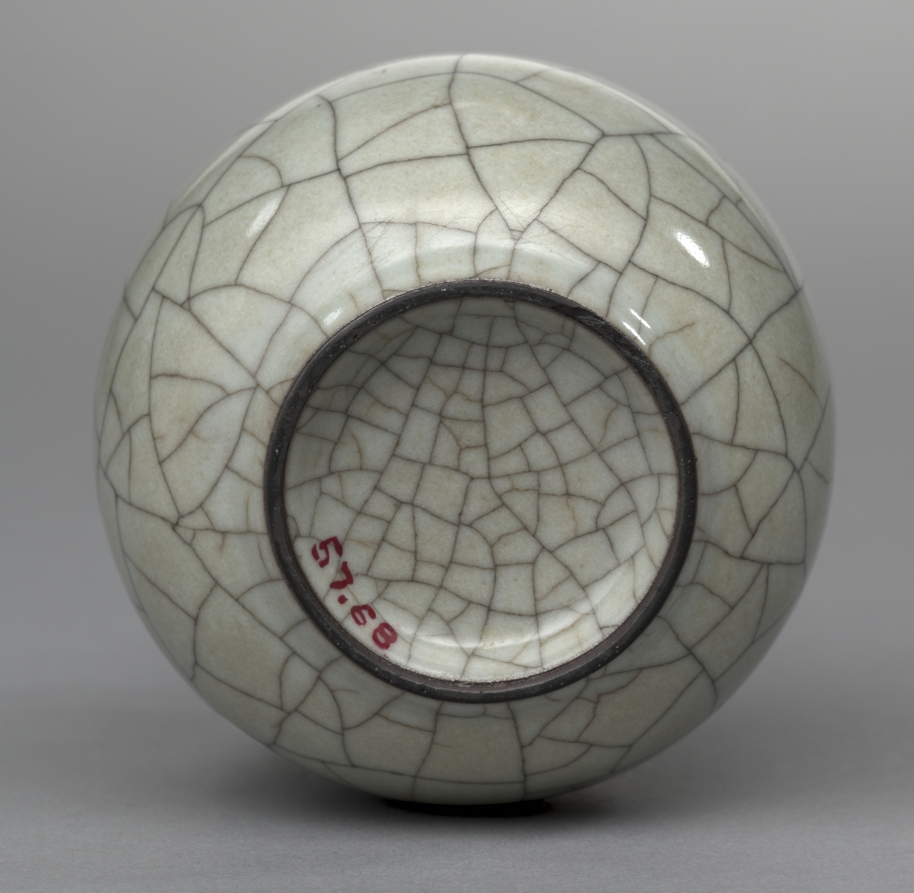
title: Bottle Vase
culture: China, Southern Song dynasty (1127-1279)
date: 1127–1279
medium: Porcelaneous stoneware, Guan ware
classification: Ceramic